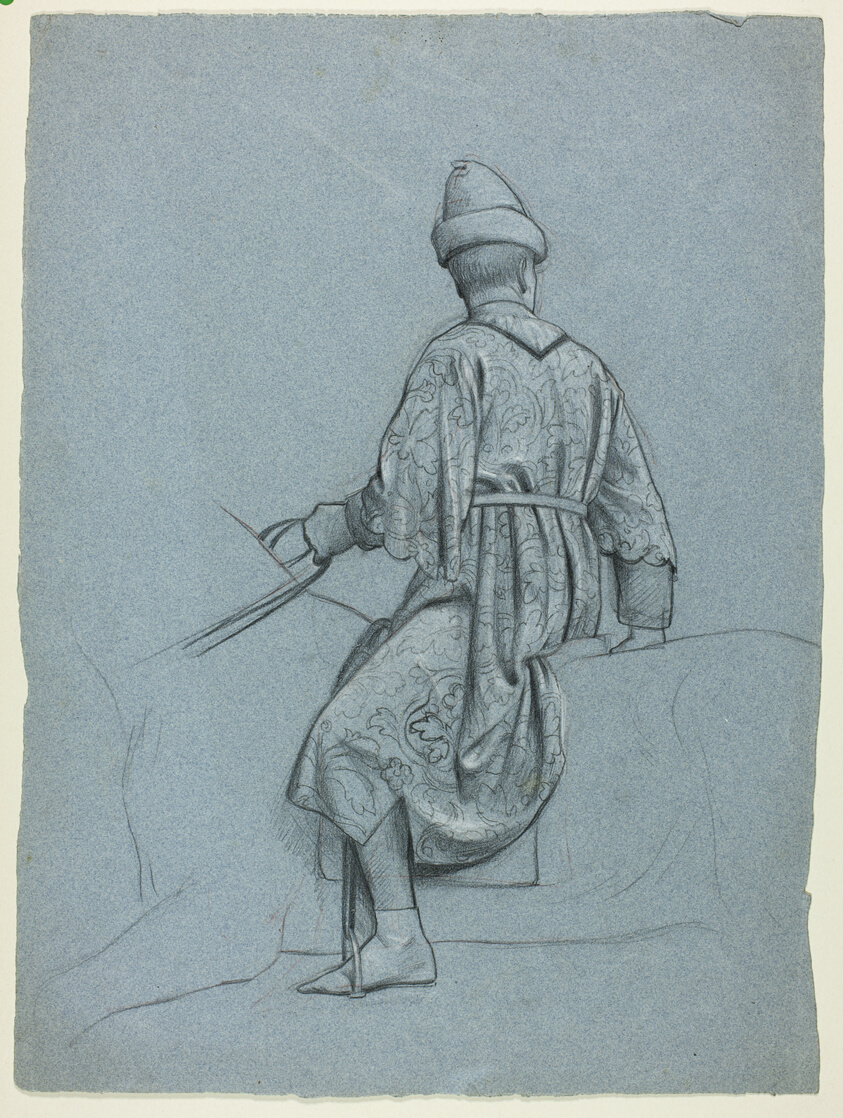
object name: Drawing and Watercolor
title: Man on Horseback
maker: Henry Stacy Marks (English, 1829-1898)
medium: Black pastel, heightened with white pastel, over traces of red pencil, on blue wove paper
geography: England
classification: pastel; drawings (visual works); prints and drawing